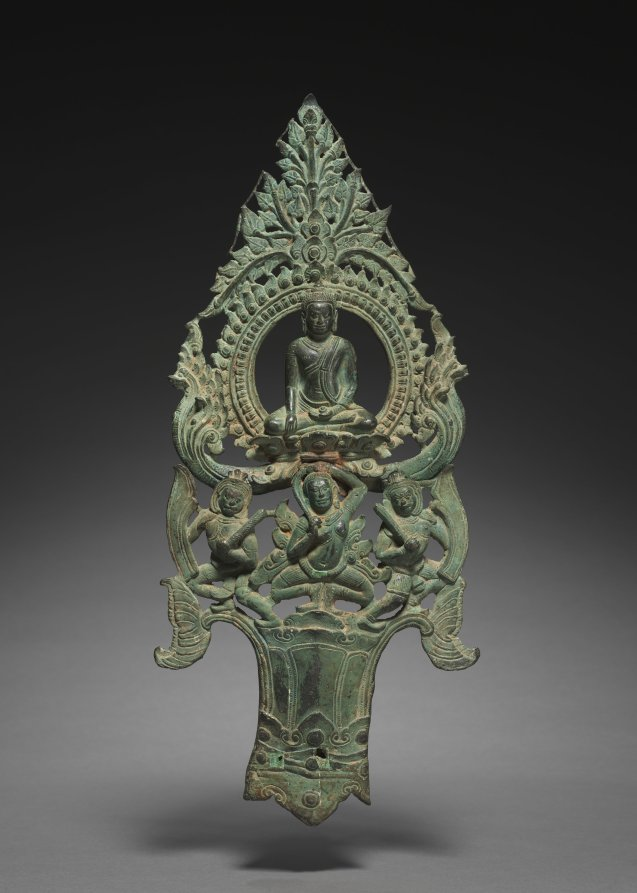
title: Portable icon of Shakyamuni Buddha in the Earth-touching gesture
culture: Cambodia, reign of Jayavarman 7th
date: late 1100s–early 1200s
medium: Bronze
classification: Sculpture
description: The Buddha sits surrounded by a circle of flaming jewels and full-blown lotus petals. Two rearing serpents emblematic of the glory of the Khmer Empire emerge from either side of his lotus pedestal. The Buddha’s right hand points down in the earth-touching gesture, and his left hand holds a round object, probably a special rice offering that indicates the Buddha’s power to ensure ongoing prosperity of the land. The branches of the pipal tree under which the Buddha reached enlightenment top the composition. Beneath his lotus pedestal, the earth goddess wrings the waters from her hair that wash away the army of Mara, the grimacing demons holding clubs and shields who flee to either side.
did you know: Bronze images such as this were used to transfer a sacred presence from one temple to another.